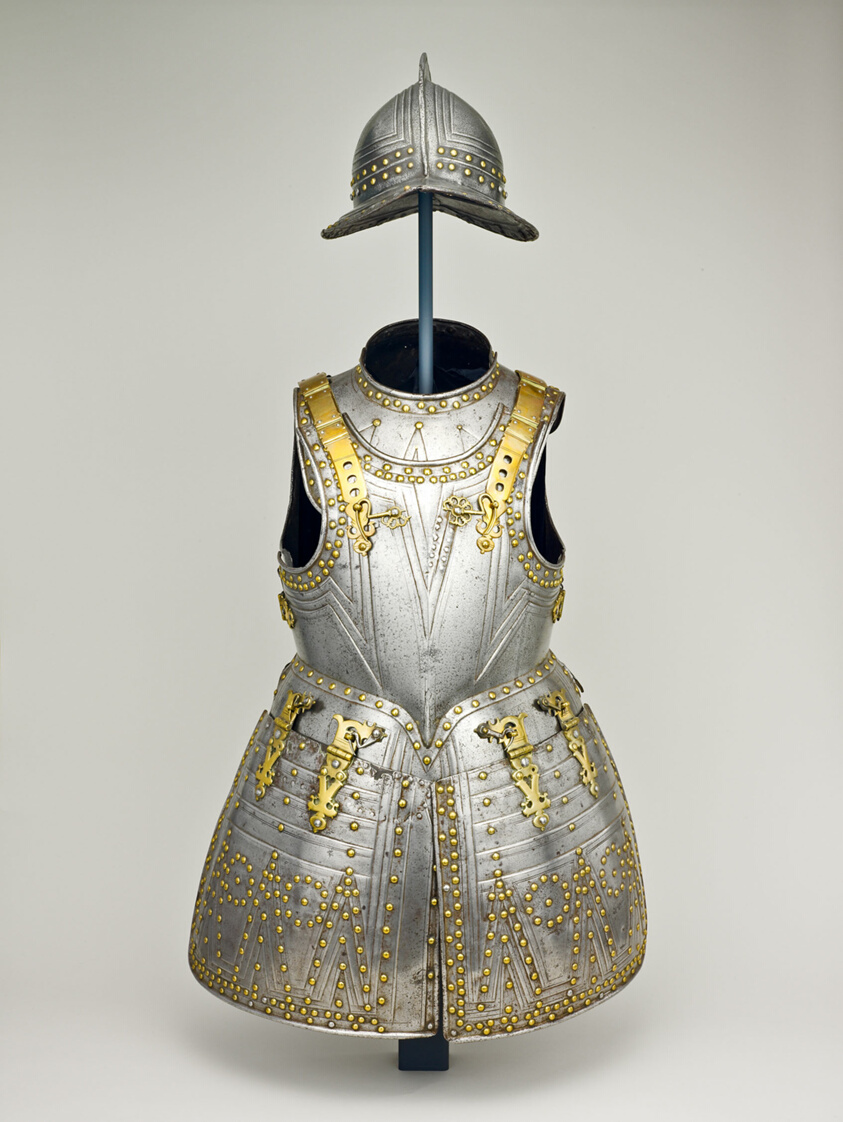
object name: Armor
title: Pikeman Armor for an Officer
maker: English, Greenwich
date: 1625/30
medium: Steel, brass, and leather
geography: Greenwich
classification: suit; armor; arms and armor